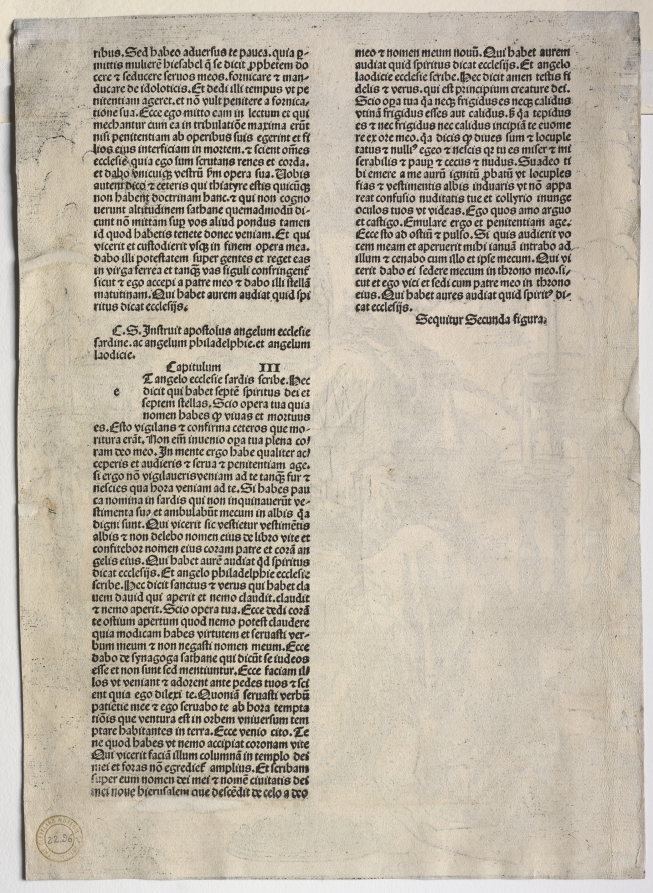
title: Revelation of St. John: St. John Beholding the Seven Candlesticks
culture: Germany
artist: Albrecht Dürer (German, 1471–1528)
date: 1511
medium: woodcut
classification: Print